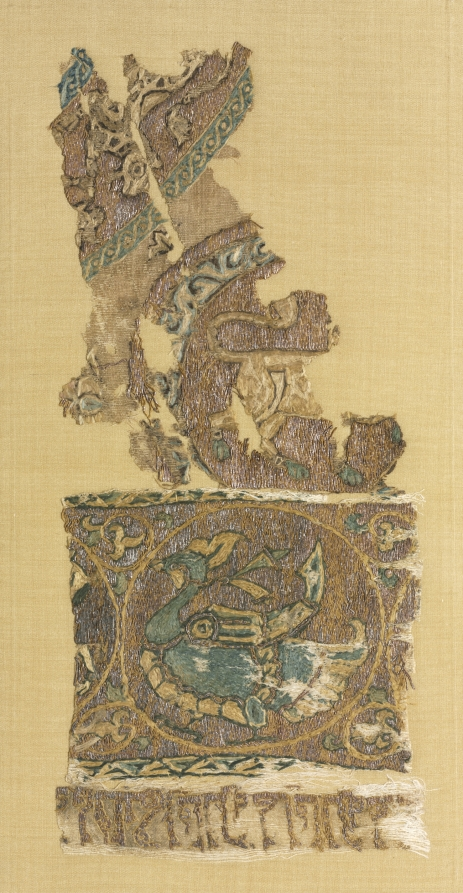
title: Embroidered border and field of animals in large roundels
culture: Iraq, probably Baghdad, Seljuk period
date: 1000s–1100s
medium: plain weave: silk warp and cotton weft (mulham): plain weave; silk and gold thread: embroidery, couched, split, running, and outline stitches:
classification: Textile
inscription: Kufic inscription in the narrow band at the bottom. Only the word "Allah" repeated twice can be deciphered.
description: This fragment preserves part of the main field and border of a large textile. At the top is a small segment of a roundel frame with fragments of a pair of confronted animals; at the lower right is part of a smaller roundel in which only the hind part of a lion or griffin remains. Below the roundels is a section of a wide border with a large bird wearing Sasanian flying ribbons about its neck. It is framed in a roundel formed by the tendrils of a scrolling vine. A narrow band at the bottom has a badly garbled Kufic inscription, which is upside down in relation to the rest of the pattern. Only the word "Allah" repeated twice can be deciphered.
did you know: Another fragment of this textile, lavishly embroidered with gilt-metal and silk thread on mulham, is now in the collection of the MFA Boston, 37.103.